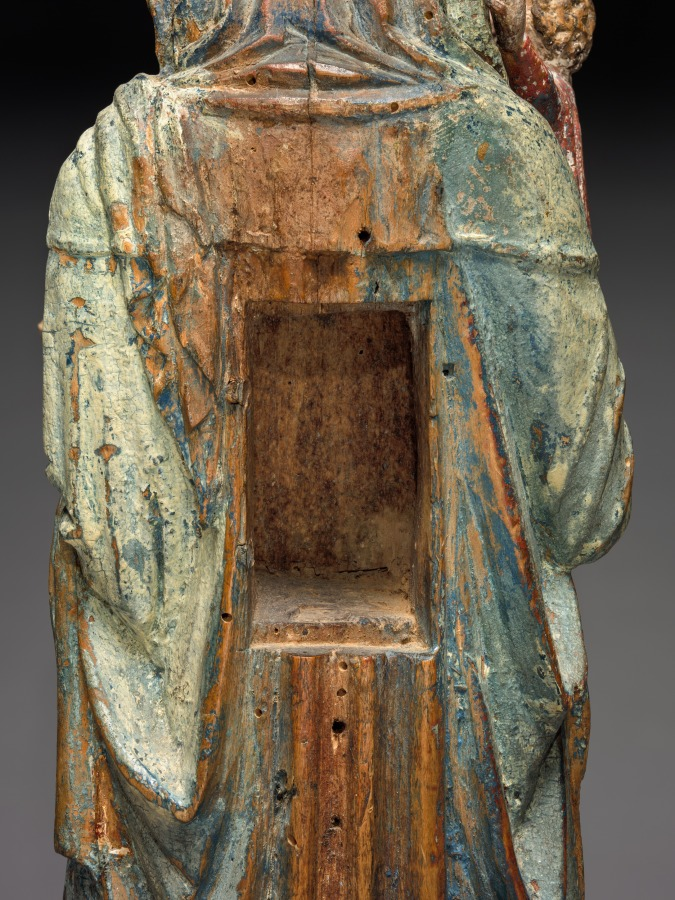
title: Reliquary Statuette of the Virgin and Child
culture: Austria, Salzburg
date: c. 1330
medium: painted lindenwood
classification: Sculpture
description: A small rectangular cavity in the back of this sculpture reveals that it was originally made to serve as a reliquary (a container for relics). In her left hand the Virgin holds a pear, a symbol of the peace and love of Christ.